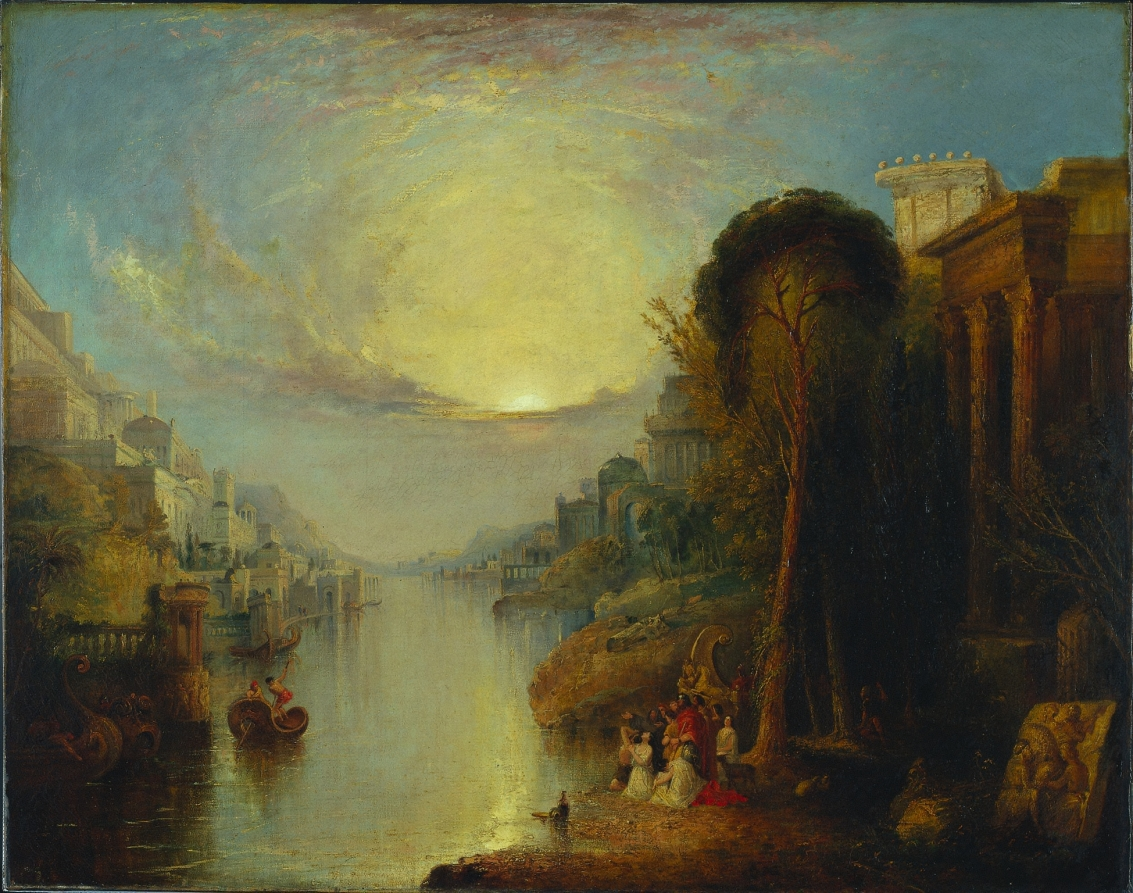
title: Carthage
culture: England, 19th century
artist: attributed to William Linton (British, 1791–1876)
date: c. 1830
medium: oil on fabric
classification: Painting